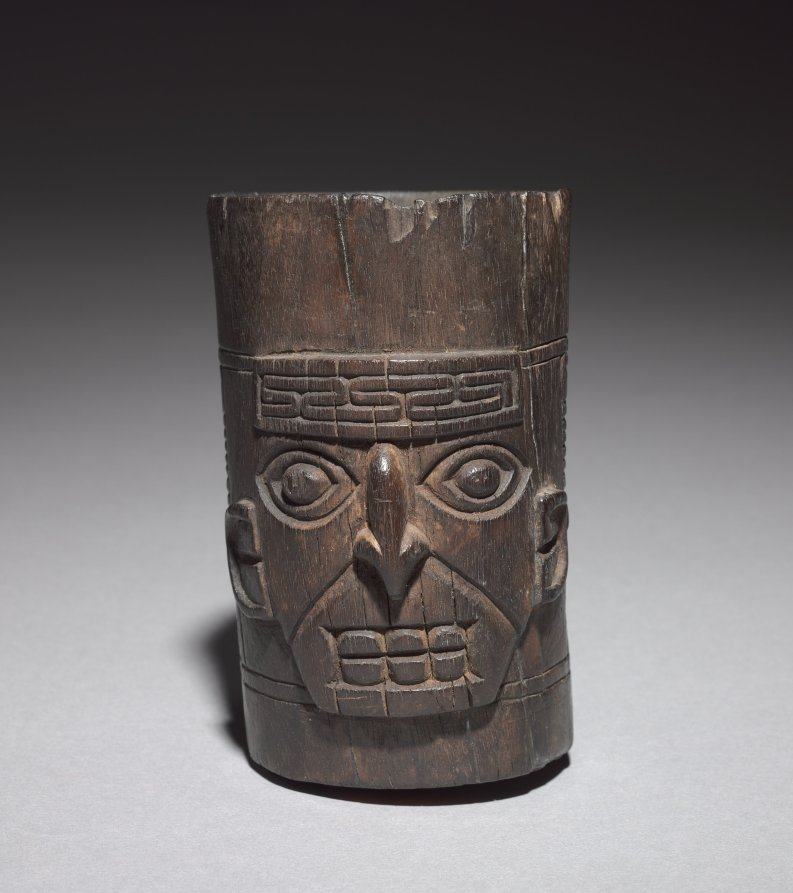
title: Cup with Head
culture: Peru, North-Central Coast(?), 9th-10th Century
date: 800–1000(?)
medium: wood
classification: Sculpture